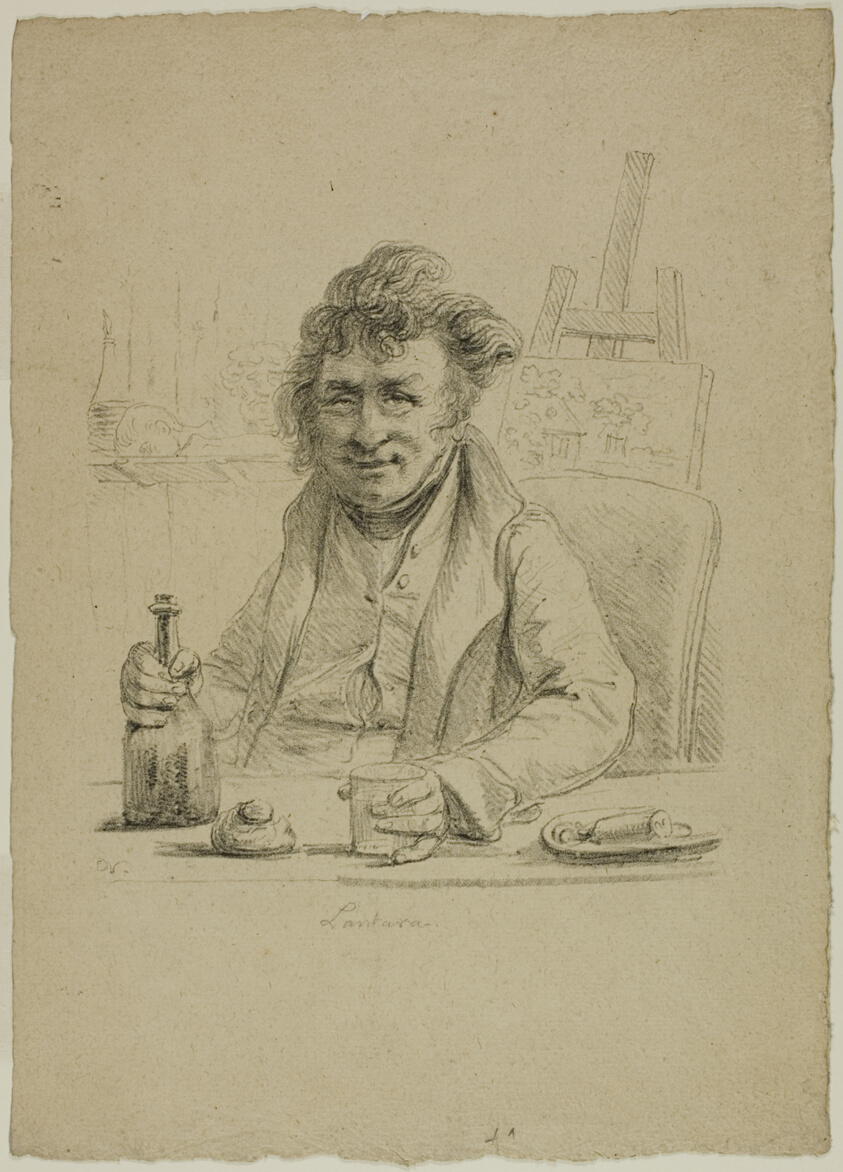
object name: Print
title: Portrait of Lantara in the Role of Joly, from Le Peintre au Cabaret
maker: Dominique-Vivant Denon (French, 1747-1825)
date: 1816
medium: Lithograph in black on buff laid paper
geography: France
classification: lithograph; print; prints and drawing